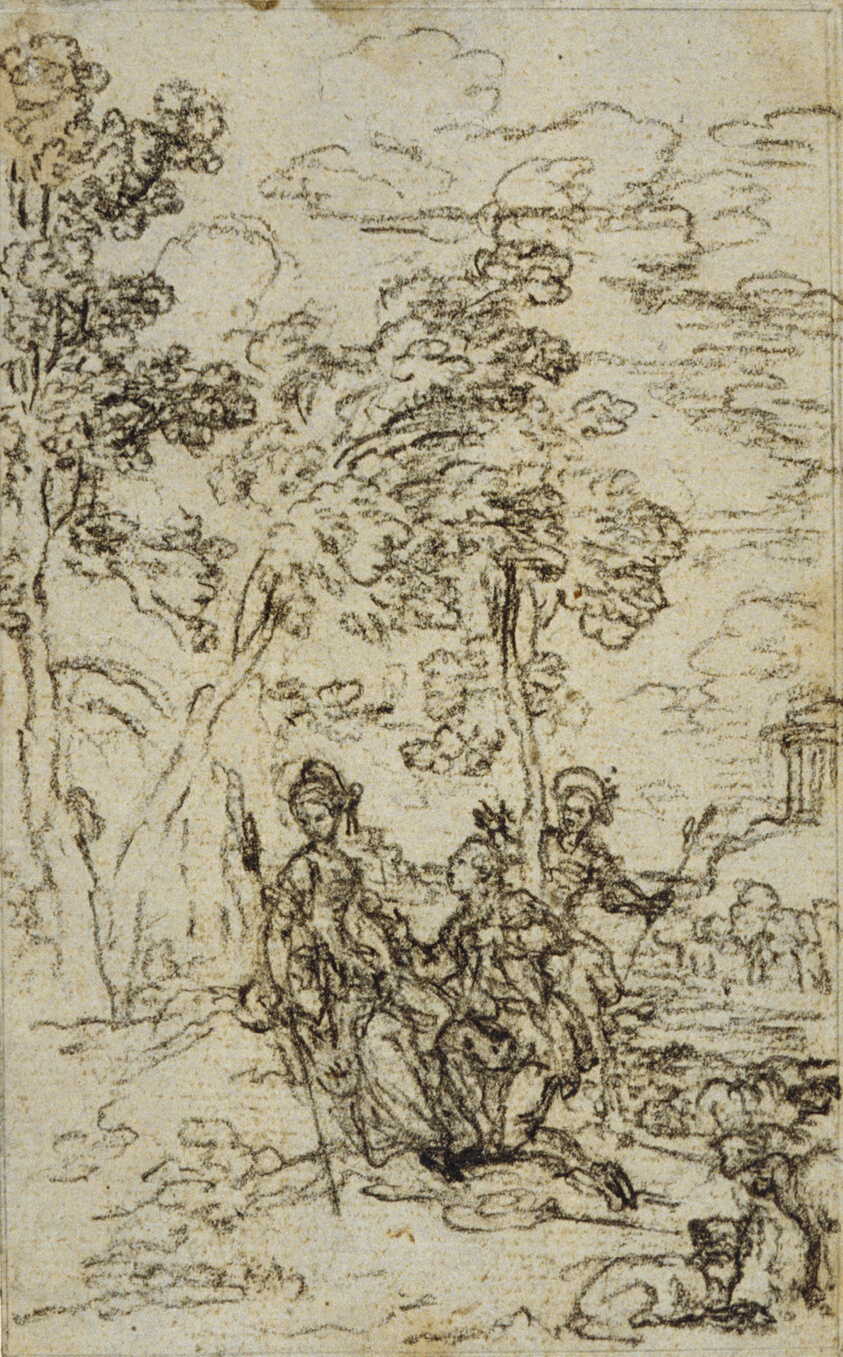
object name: Drawing and Watercolor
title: Study for Vignette in Fontenelle's (attr.) "Les Amours de Mirtil", Canto III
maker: Hubert François Gravelot (French, 1699-1773)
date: c. 1761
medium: Black chalk, on gray laid paper, laid down on ivory laid paper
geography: France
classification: crayon; drawings (visual works); prints and drawing